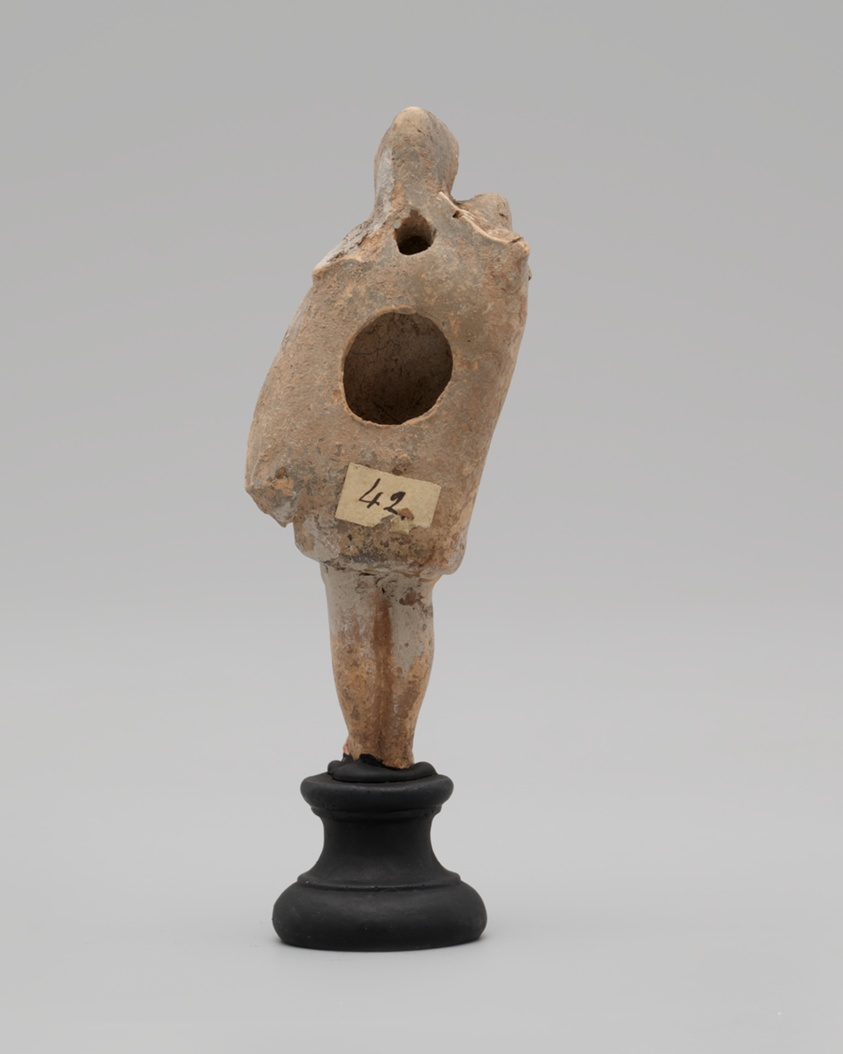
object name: Sculpture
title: Figurine of a Man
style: greek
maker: Greek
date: 4th-3rd century BCE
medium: terracotta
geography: Greece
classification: earthenware; ceramics; sculpture; ancient art